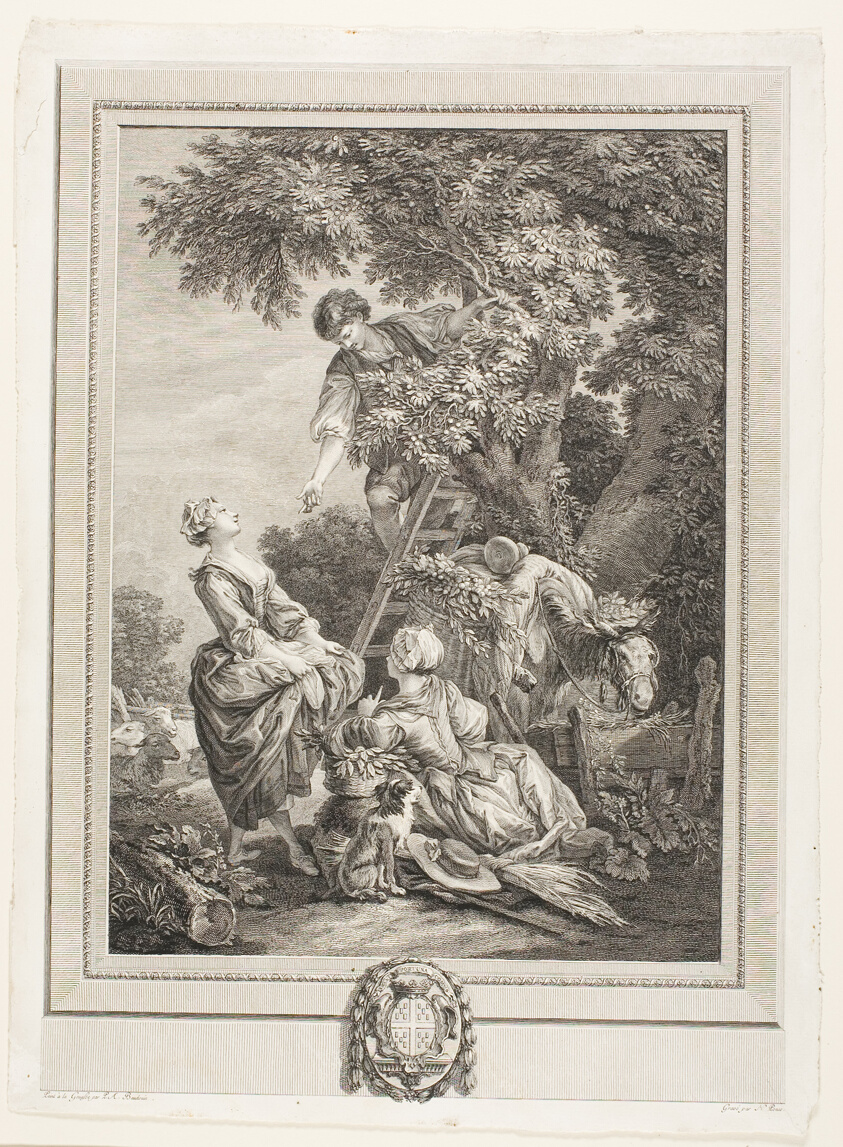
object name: Print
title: Cherries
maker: Nicolas Ponce (French, 1746-1831); after Pierre Antoine Baudouin (French, 1723-1769)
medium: Etching on paper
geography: France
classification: etching; print; prints and drawing